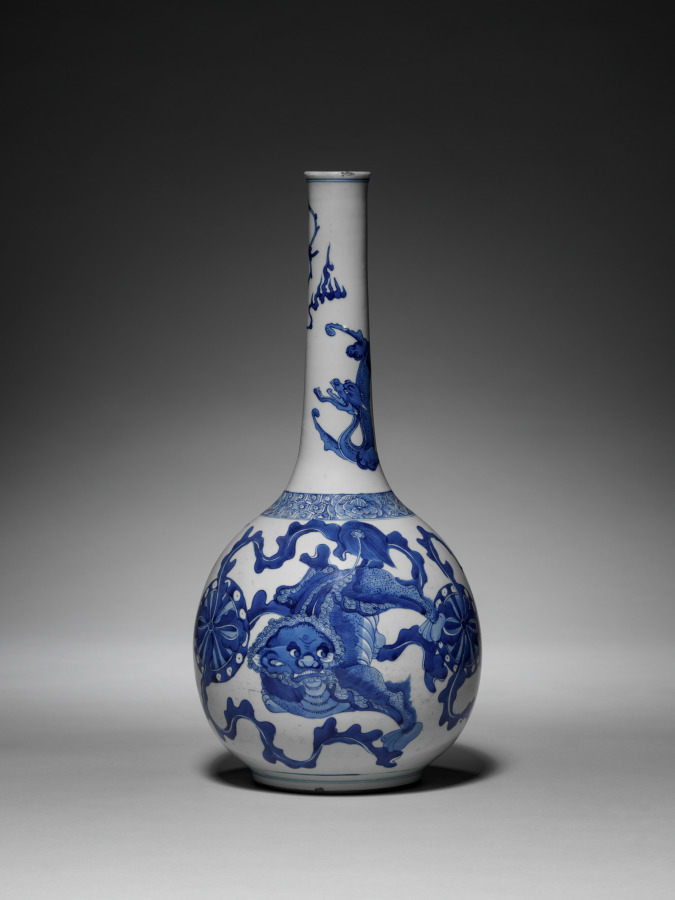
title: Bottle Vase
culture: China, Qing dynasty (1644-1911), Kangxi reign (1661-1722)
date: 1662–1722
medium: porcelain with underglaze blue decoration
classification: Ceramic